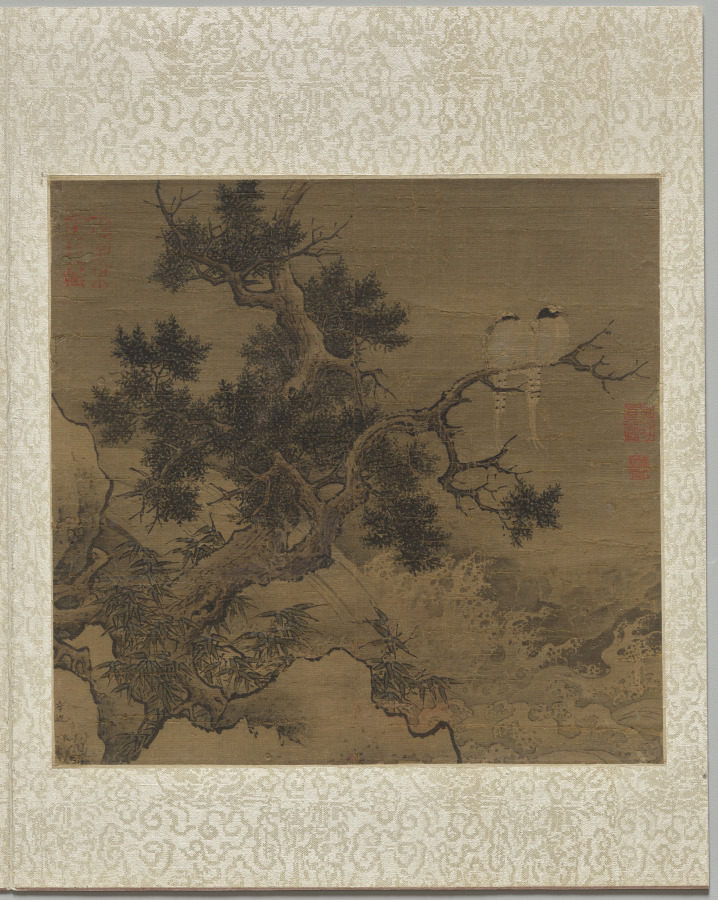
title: Birds on a Tree above a Cataract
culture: China, Southern Song dynasty (1127-1279)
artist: Li Di (Chinese, c. 1100-c. 1192)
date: 1127–1279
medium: Album leaf; ink and color on silk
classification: Painting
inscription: A signature at lower left edge.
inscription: 3 additional seals: 1 of Xiang Yuanbian 項元汴 (1525-1590), 2 of Wu Maohe 吳懋和 (1600s).